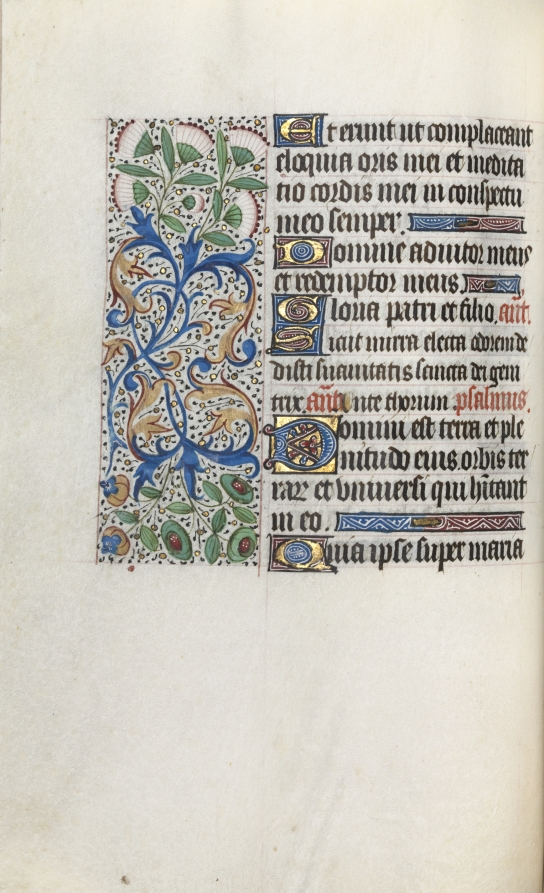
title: Book of Hours (Use of Rouen): fol. 33v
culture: France, Rouen, 15th century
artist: Master of the Geneva Latini (French, active Rouen, 1460–80)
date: c. 1470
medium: ink, tempera, and gold on vellum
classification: Bound Volume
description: In the late 1400s and early 1500s Rouen was an established and important center of book production. The city’s cathedral had a wealthy chapter that spent large sums of money to commission books and to maintain its extensive library. The stationers and booksellers would have likely been concentrated in or near the cathedral precinct. This artist, named after a manuscript now in Geneva, was Rouen’s principal illuminator during the second half of the 1400s.